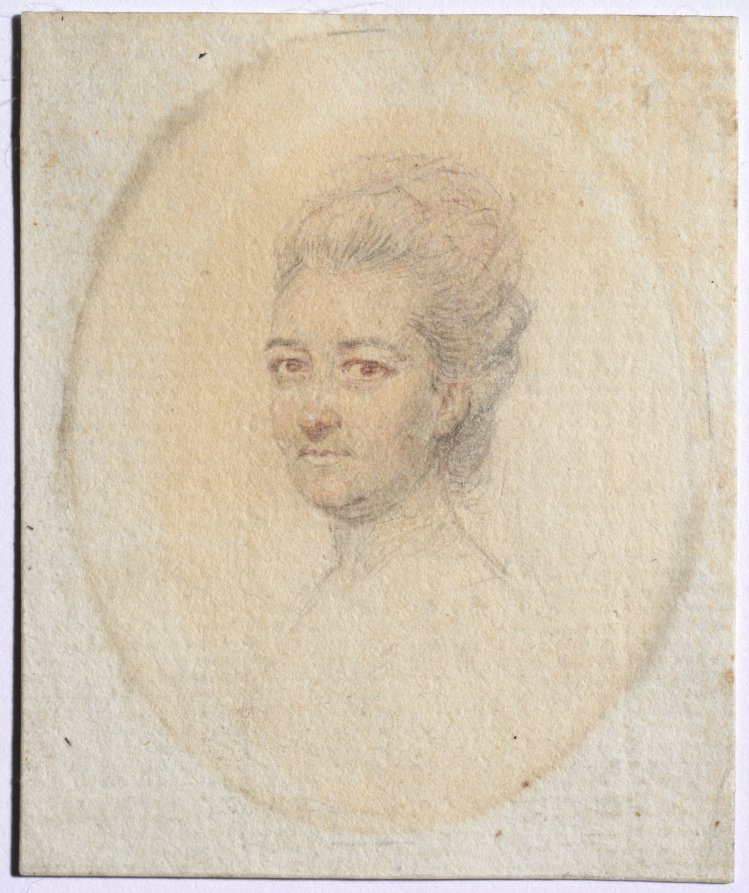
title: Portrait of a Woman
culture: England, 18th century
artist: John I Smart (British, 1741–1811)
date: c. 1775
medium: graphite and wash on laid paper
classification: Portrait Miniature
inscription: inscribed on paper backing in graphite, upside down, at upper right: 139; also on paper backing in graphite on slant at lower right corner: La belle/Gabrielle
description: Although it is impossible to say if it was always part of the artist’s process to execute a preparatory sketch prior to painting each miniature, we do know that John Smart retained many hundreds of these sketches. A group of preparatory sketches—of which this portrait is one—descended through the Smirke family after Smart’s daughter Sarah gave a sketchbook containing preparatory portrait studies to her friend Mary Smirke, sister of the celebrated Victorian architect Sydney Smirke. This book was probably broken up around 1877 when it was divided between Sydney’s daughters Mary Jemmett and Mrs. Lange, whose portions were both sold at auction in 1928. This portrait was assigned the historically colorful but fictitious title of “La Belle Gabrielle” at some point after memory of its true identity had been lost. Giving illustrious titles to portraits of unknown sitters was a popular strategy adopted by dealers during the nineteenth and twentieth centuries, often applied to miniature portraits and, in particular, to Smart’s sketches of women. The inscription on the paper backing is not in Smart’s hand, and when the paper backing was removed in 1993, no inscriptions were discovered on the back of the drawing itself. Only the sitter’s head and neck are drawn, and a low-necked dress is faintly suggested. Her head is turned to the right, and her light-colored hair is dressed high, with flat curls against the back of her head. She has brown eyes, and the color of her lips is extremely faded, though the hint of a ruddy complexion remains. Her sagging jaw line and the lines beneath her eyes suggest that this sitter was painted as a mature woman. The background is unpainted. To this date, the finished ivory for which this preparatory sketch was presumably undertaken has not been discovered.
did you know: Sketches helped John Smart work out the particulars of a portrait before commencing the miniature on ivory; they were useful in the event that a duplicate might later be required.